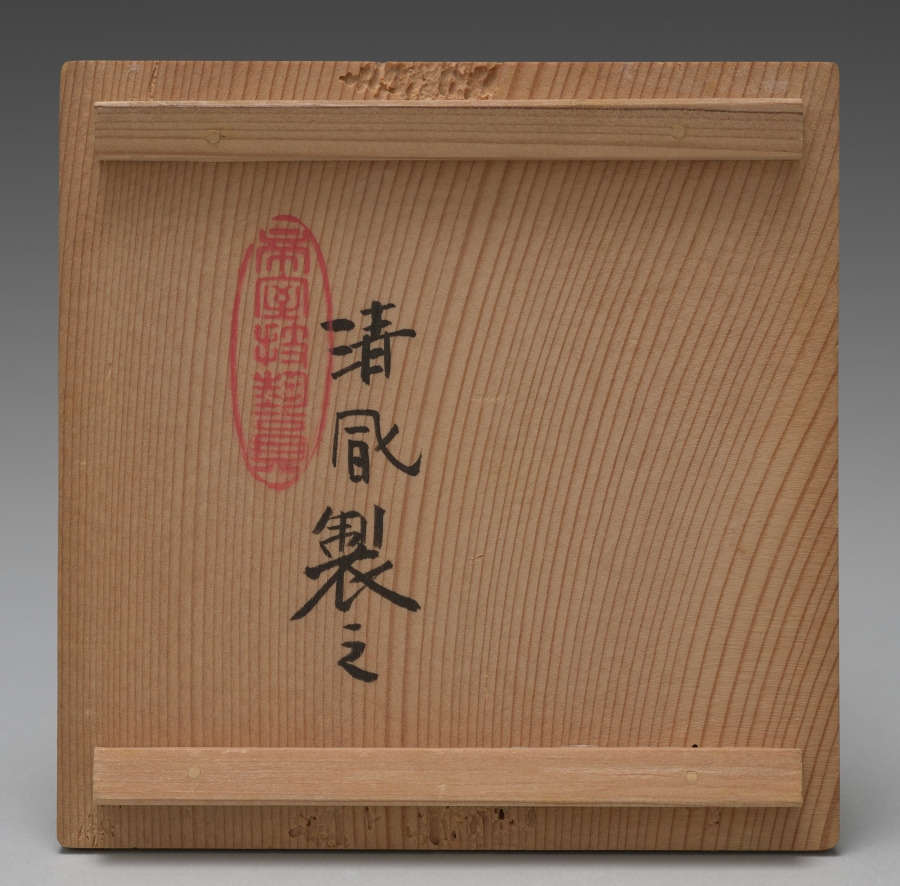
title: Teapot with Cherry at Night in Gion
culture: Japan, Meiji period (1868–1912)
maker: Seifū Yohei III (Japanese, 1851–1914)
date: 1893–1914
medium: Porcelain with underglaze blue and iron oxide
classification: Ceramic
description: This side-handled sencha teapot with the cherry tree has a nearly spherical shape, and its recessed lid has an ovoid knob. It has both blue and a purplish brown under the glaze for the blossoms and embers on one side, and the vertical calligraphy identifies the tree as a cherry tree at night in the Gion area of Kyoto. To the right of the tree, smoke billows from a small lantern fire in a basket suspended on a post. In terms of collecting history, a paper inserted into the box of Teapot with Cherry at Night in Gion is of interest. It is a flyer for Yamamoto Shōseidō, a shop (no longer extant) that sold fine Kyoto ceramics in Osaka.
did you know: This teapot features the Japanese theme of a blossoming cherry tree in the Gion area of Kyoto in underglaze blue and brown.